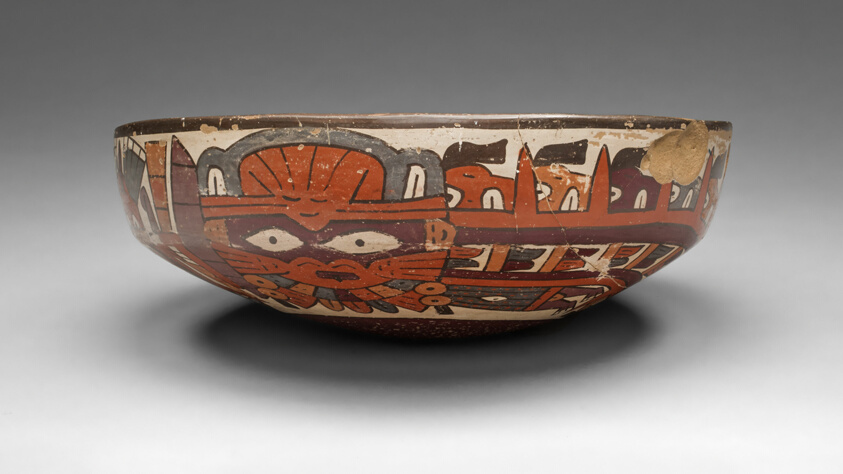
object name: Vessel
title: One of a Pair of Matched Bowls Depicting Costumed Ritual Performers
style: nazca, early intermediate period, Pre-Columbian, americas, andes, Arts of the Americas, andean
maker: Nazca; South coast, Peru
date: 180 BCE–500 CE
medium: Ceramic and pigment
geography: Peru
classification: bowl; earthenware; art of the americas; ceramics; vessel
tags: abstract figures, agriculture, costumed performer, anthropomorphic figure, ritual performer